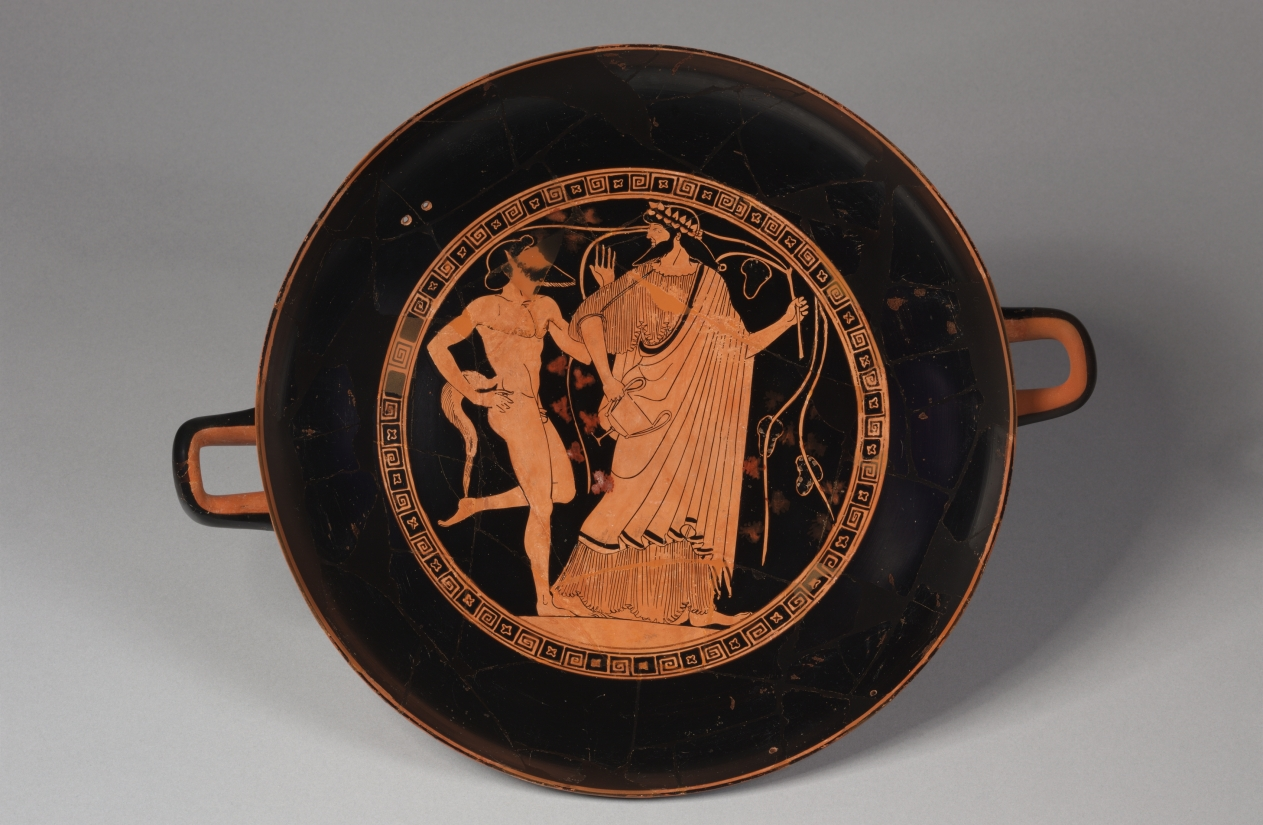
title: Red-Figure Kylix (Drinking Cup): Dionysos and Satyr (I); Satyrs and Maenads (A, B)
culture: Greece, Athens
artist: attributed to Douris (Greek, Attic, active c. 500–470 BCE)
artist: or Painter of London E 55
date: c. 480 BCE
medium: ceramic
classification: Ceramic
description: Reconstructed from 72 fragments, this cup has been repaired several times, indicating its enduring value to owners. Pairs of holes straddling cracks once held ancient wire or clamp repairs. Numerous incomplete holes may signify recent interventions. Early modern efforts to hide cracks and certain features of the satyrs that could have offended sensibilities of the time also masked the original artistry of its painting. So, for many years the cup languished in storage. Cleaning and reconstruction in 1952–53 revealed enough to allow attribution to a respected vase painter, Douris, reviving the cup’s reputation. More recently, a different attribution has been suggested, and a new conservation campaign replaced ancient parts from a different cup with modern reconstructions more like those lost.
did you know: In the tondo, a dancing satyr approaches the wine god Dionysos, who holds a kantharos and grapevine.